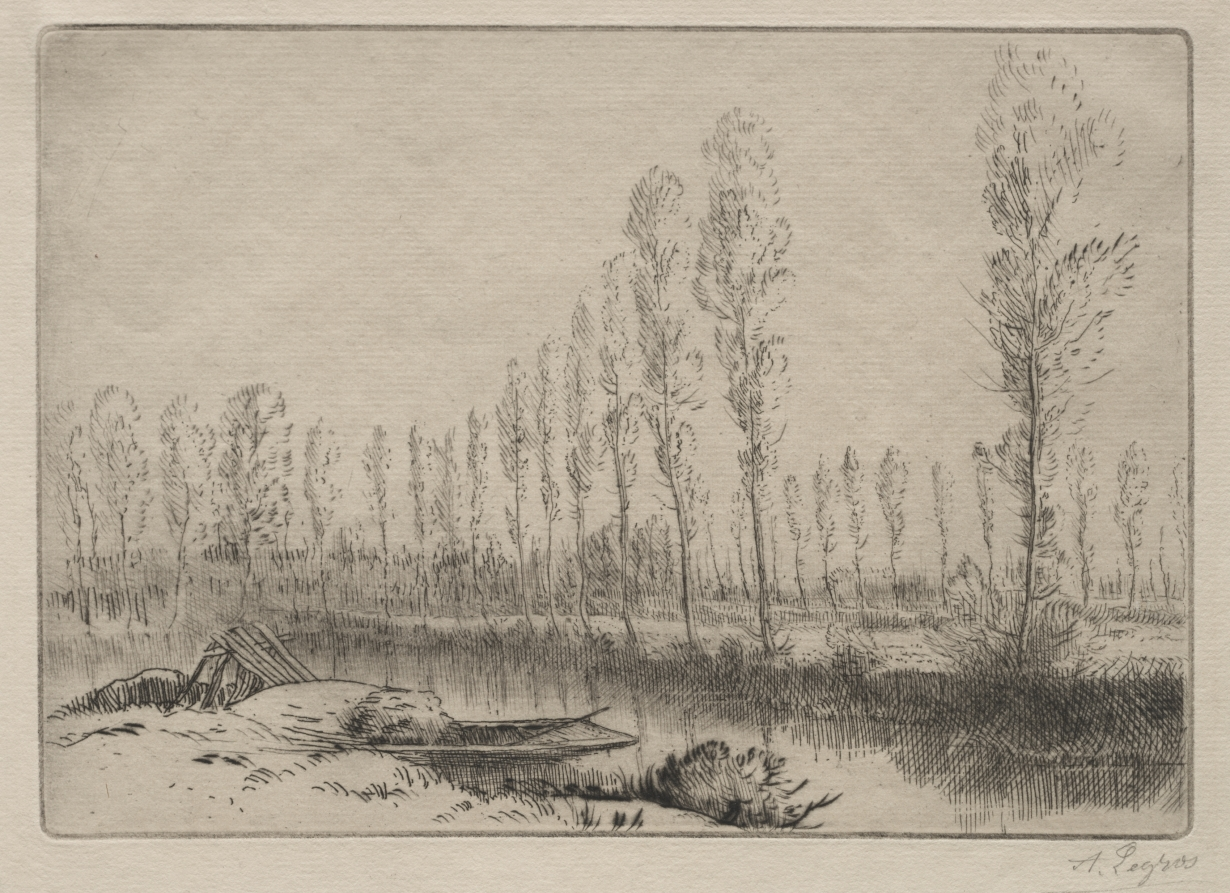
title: Près d'Amiens, les tourbières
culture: France, 19th century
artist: Alphonse Legros (French, 1837–1911)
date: c. 1857–1911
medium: etching and drypoint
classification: Print